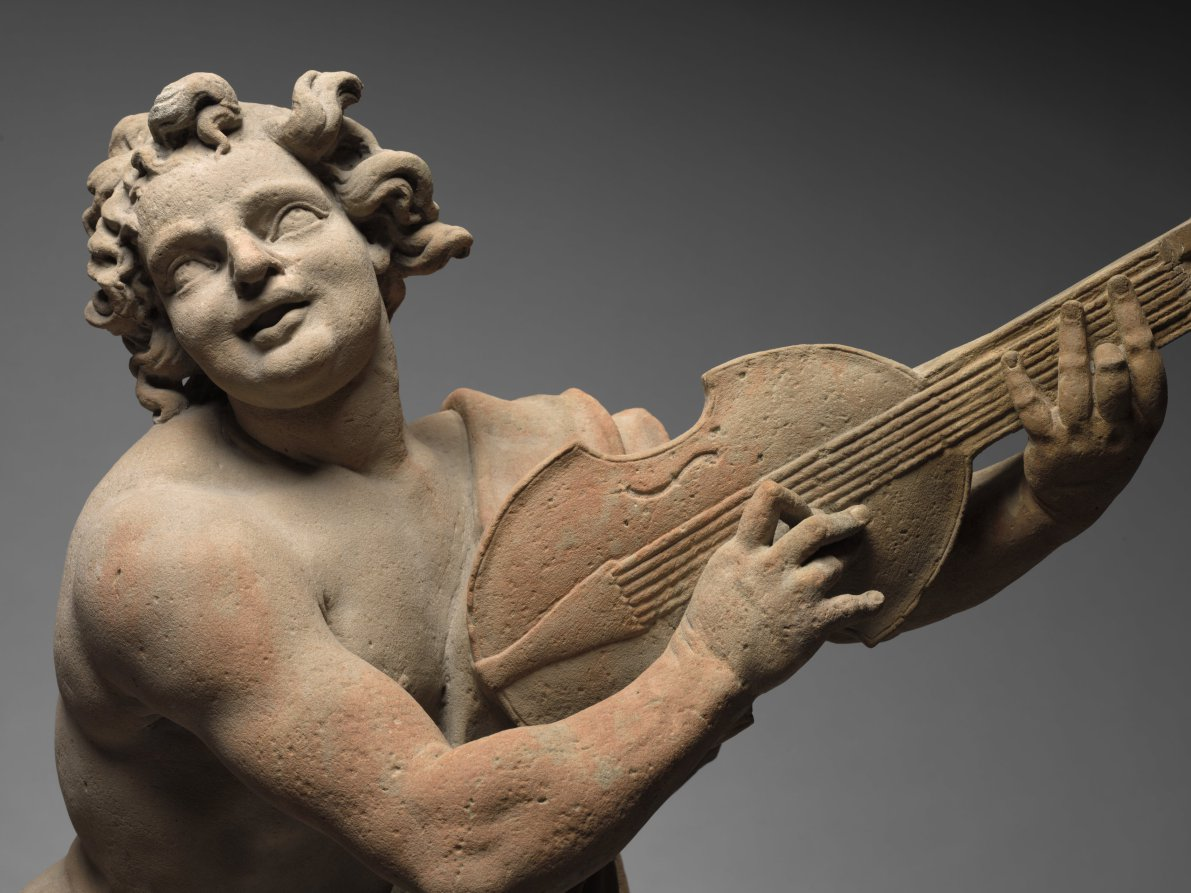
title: Orpheus and Cerberus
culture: Germany, near Bamberg, 18th century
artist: Ferdinand Tietz (Austrian, 1708–1777)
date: c. 1765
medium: sandstone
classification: Sculpture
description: This work was one of numerous sculptures Tietz created for the gardens of Schloss Seehof, near Bamberg in Bavaria (Germany), the summer residence of the Prince Bishops of Bamberg. The exaggerated forms of Orpheus's face and musculature caricature the idealized proportions of classical sculpture. A further parody exists with his companion: the usually terrifying hound Cerberus is here nothing more than a docile puppy, sitting calmly at Orpheus's feet. Meant to be viewed outdoors, on a high pedestal and from a distance, this work is less finely detailed than sculptures Tietz made for indoor settings at Seehof.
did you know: Taught to play the lyre by the Greek god Apollo, Orpheus's legendary musical abilities had the power to charm animals.